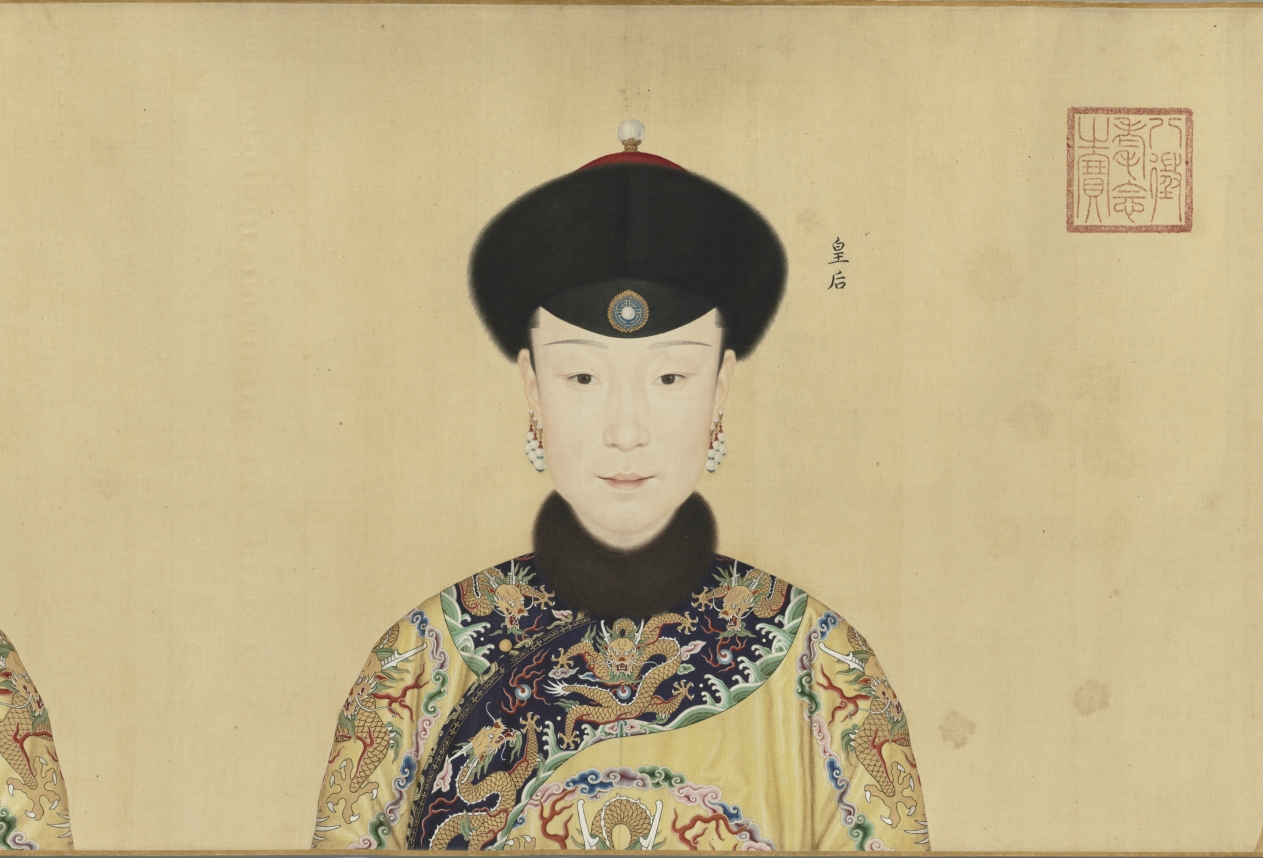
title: Portraits of the Qianlong Emperor and His Twelve Consorts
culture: China, Qing dynasty (1644–1911), Qianlong reign (1736–95)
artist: Giuseppe Castiglione (Italian, 1688–1766)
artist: and others (Chinese)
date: 1736–70s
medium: Handscroll; ink and color on silk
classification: Painting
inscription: 9 seals of the Qianlong emperor (r. 1736–95).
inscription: The eighth month, first year of Qianlong [1736] 乾隆元年八月吉日. The Empress (Xiaoxian) 皇后 (1712–1748), The Guifei (Huixian) 貴妃 (?-–1745), Chunfei 純妃 (1713–1760), Jiafei 嘉妃 (?–1755), Lingfei 令妃 (1727–1775), Shufei 舒妃 (1728–1777), Qingbin 慶嬪 (1724–1774), Yingbin 穎嬪 (1731–1800), Xinbin 忻嬪 (?–1764), Dunfei 惇妃 (1746–1806), Xunfei 順妃 (1749–1788), Shunbin 循嬪 (?–1797).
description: This portrait shows the Qianlong emperor at 26, in the first year of his reign. His likeness is followed by portraits of the empress and eleven consorts. Their portraits document the appearances of the court women around the time when they received their respective imperial titles, which occurred at different stages of the emperor's life. The first three portraits were done by the Jesuit (Roman Catholic) missionary artist Giuseppe Castiglione, whereas the later ones were by Chinese court painters. Formal portraiture contributed to the affirmation of status and construction of role and identity. This scroll served as both familial documentation and a "mind picture" of the Qianlong emperor, suggesting that his constructed image of emperorship was inseparable from concepts of self and family. It was stored in a carved red lacquer box bearing the original painting title Mind Picture of a Well-Governed and Tranquil Reign (see CMA 1969.32).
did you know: Lingfei 令妃 (1727–1775), the first consort depicted in the maroon or “incense-colored" 香色 robe, was the mother of six of Qianlong’s children, including the future Emperor Jiaqing.